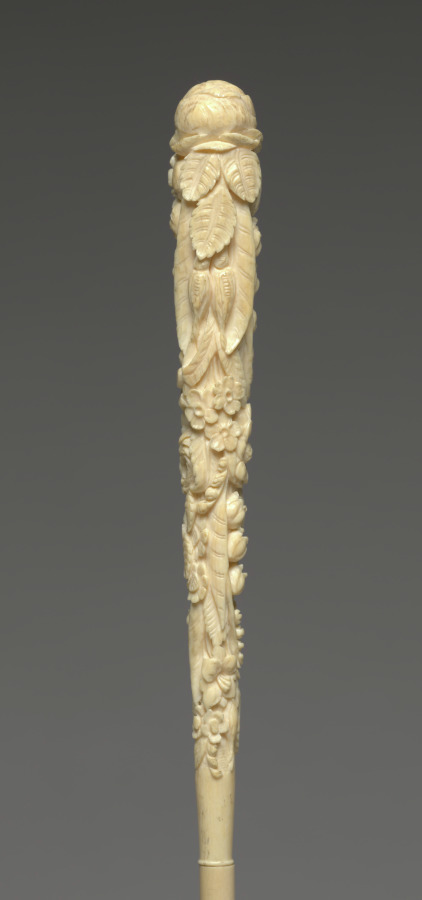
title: Lace Parasol with Ivory Handle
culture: Belgium, Brussels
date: 1880–99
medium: Needle lace and bobbin lace (Point Duchesse Lace) with carved ivory handle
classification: Lace